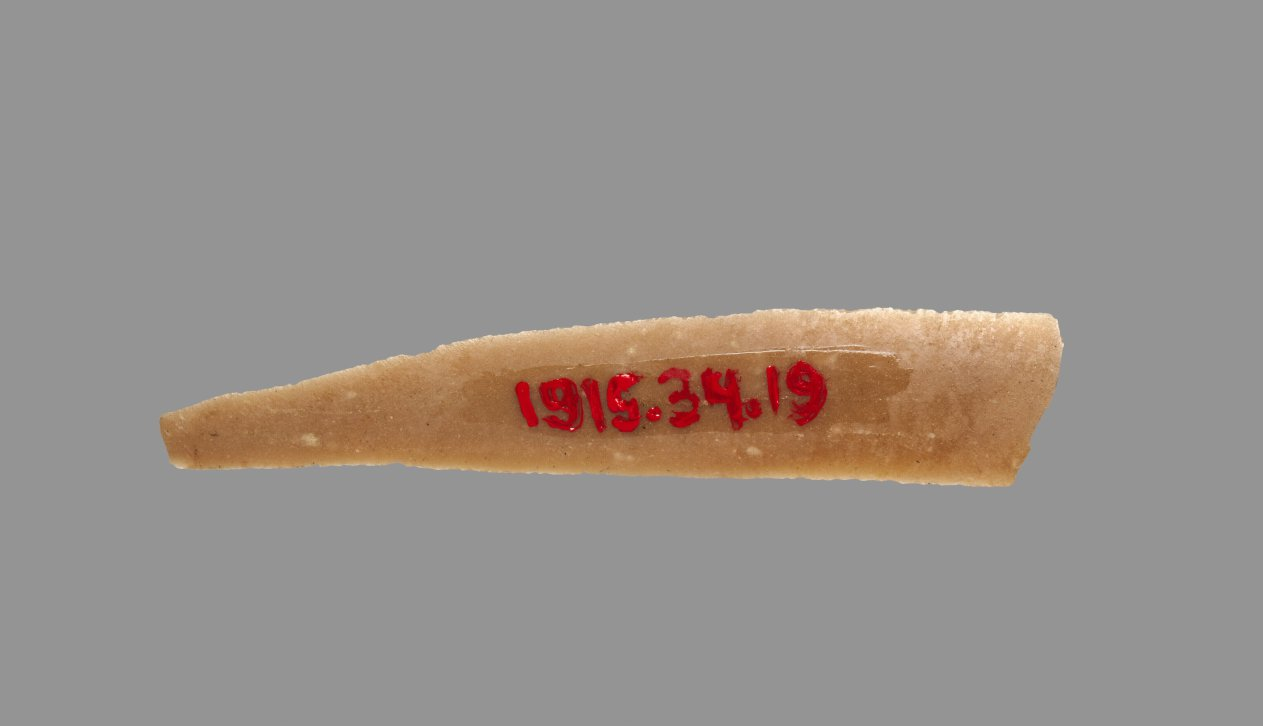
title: Sickle Blade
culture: Egypt, Middle Kingdom (2040–1648 BCE), Dynasty 12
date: 1980–1801 BCE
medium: flint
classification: Implements